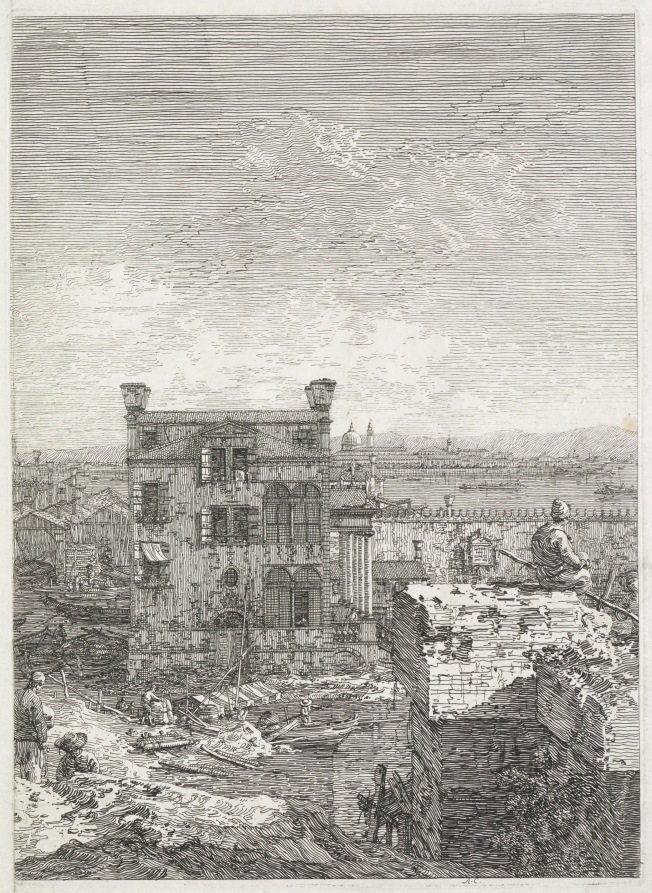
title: Views: A House Surrounded by Six Columns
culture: Italy, Venice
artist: Antonio Canaletto (Italian, 1697–1768)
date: 1735–1746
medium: etching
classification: Print